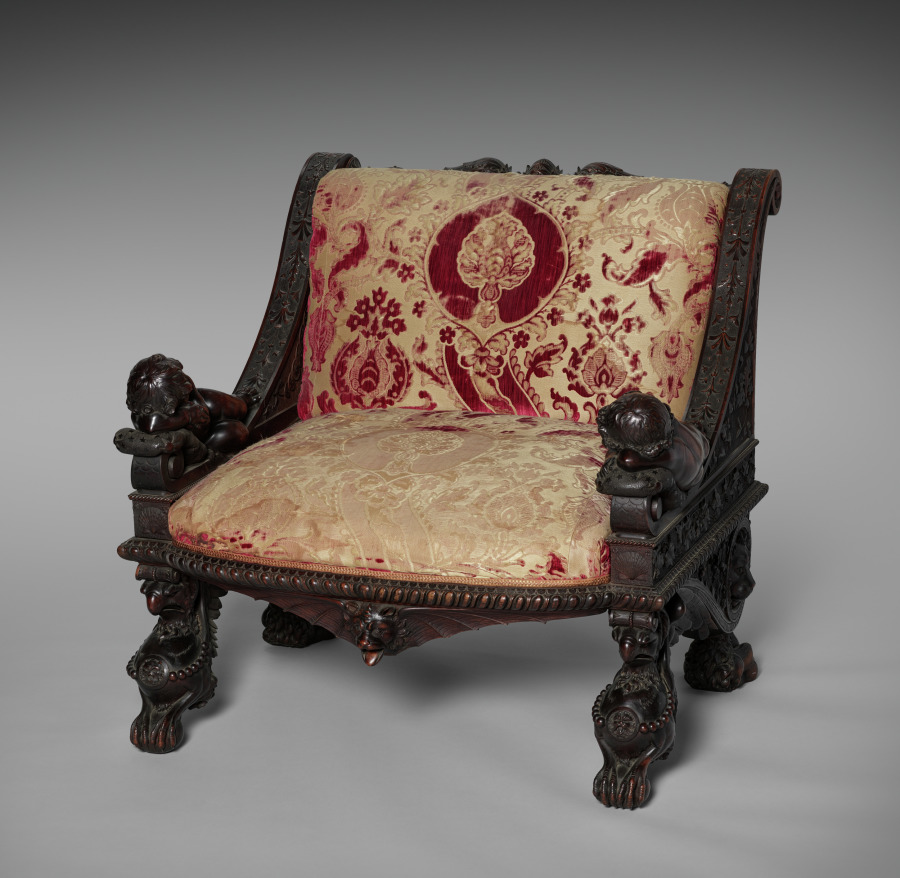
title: Armchair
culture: Italy, Florence, 19th century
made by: Luigi Frullini (Italian, 1839–1897)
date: 1876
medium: walnut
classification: Furniture and woodwork